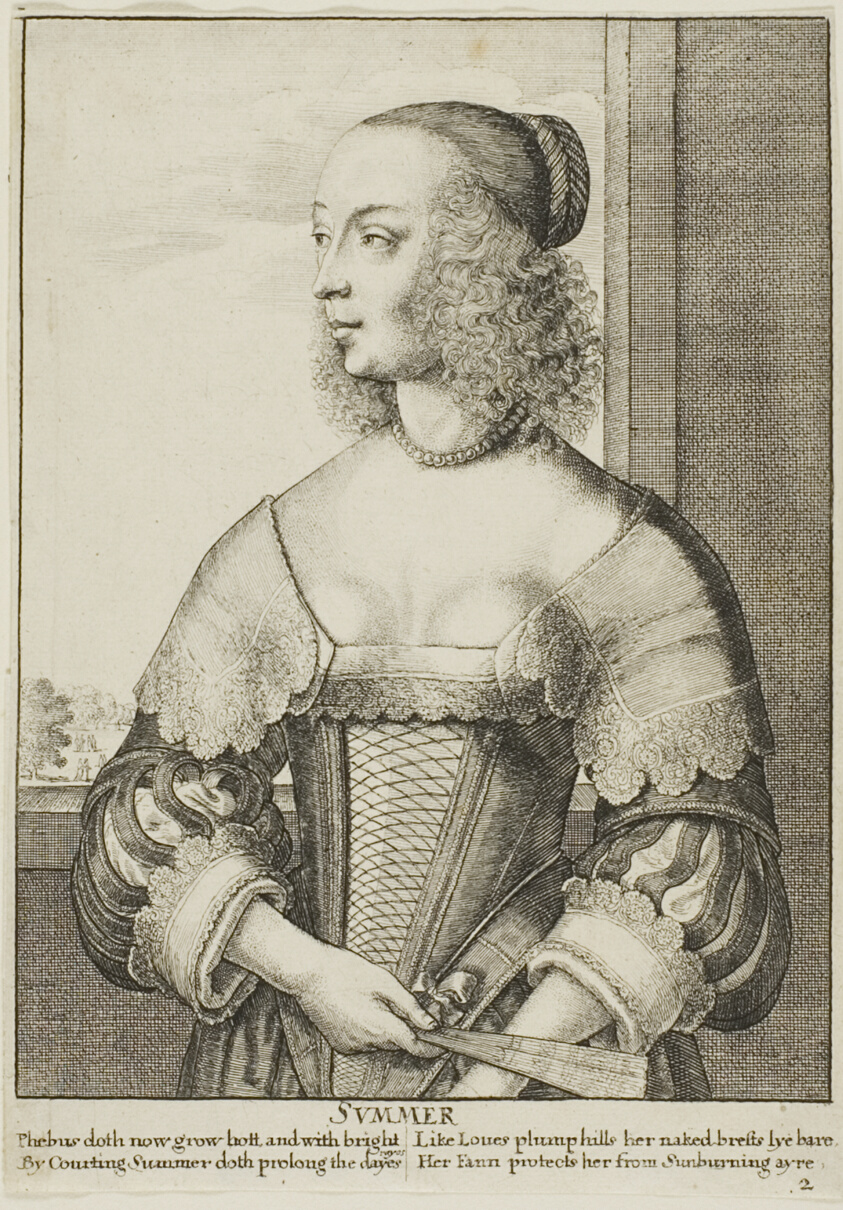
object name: Print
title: Summer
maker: Wenceslaus Hollar (Bohemian, 1607-1677)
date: 1644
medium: Etching on ivory laid paper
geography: Bohemia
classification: etching; print; prints and drawing